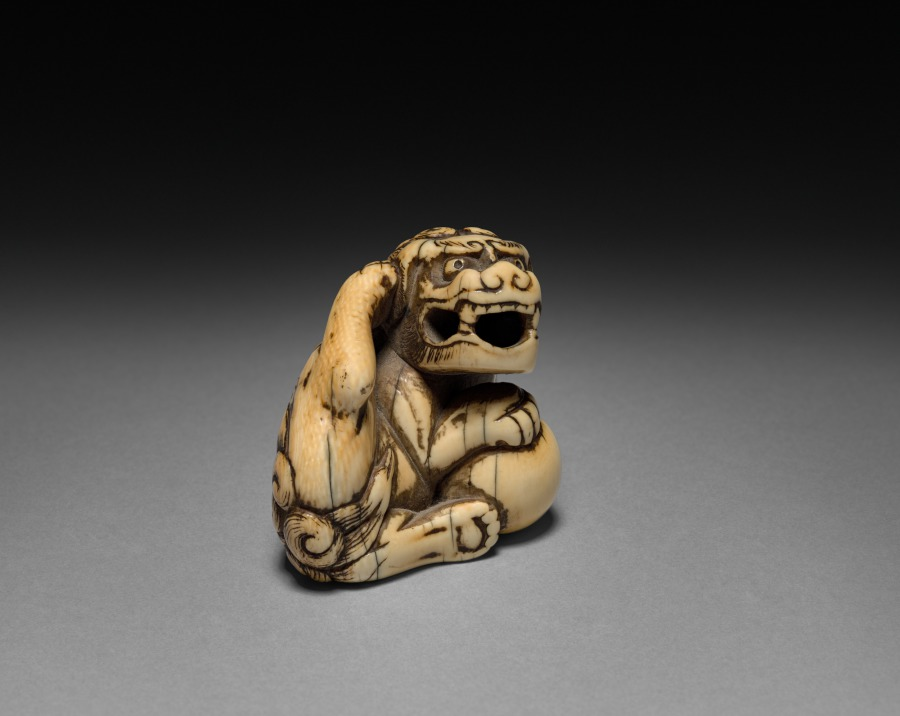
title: Chinese Lion with Ball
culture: Japan, Meiji period (1868–1912)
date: early 1900s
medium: ivory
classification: Netsuke